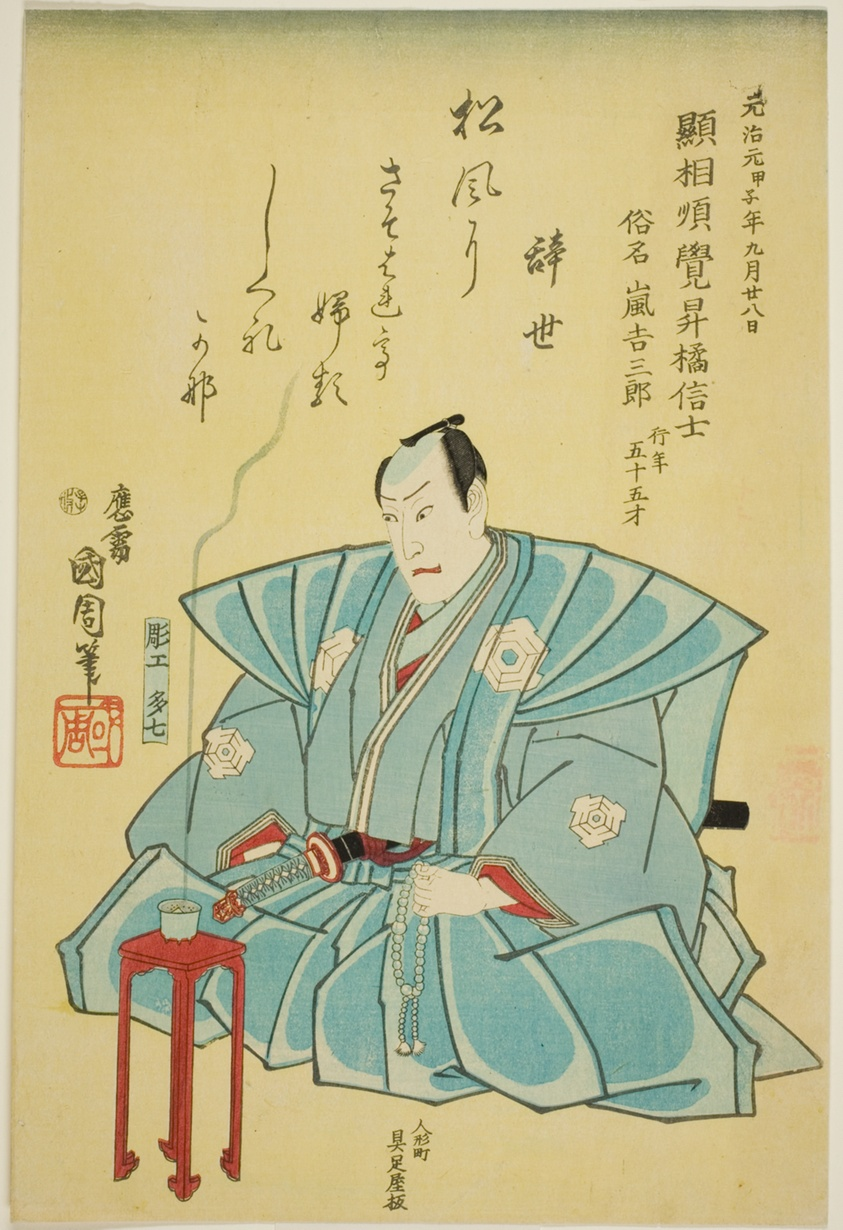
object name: Print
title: Memorial Portrait of the Actor Arashi Kichisaburo III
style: Japanese (culture or style)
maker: Toyohara Kunichika (Japanese, 1835-1900)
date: 1864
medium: Color woodblock print; oban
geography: Japan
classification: print; asian art